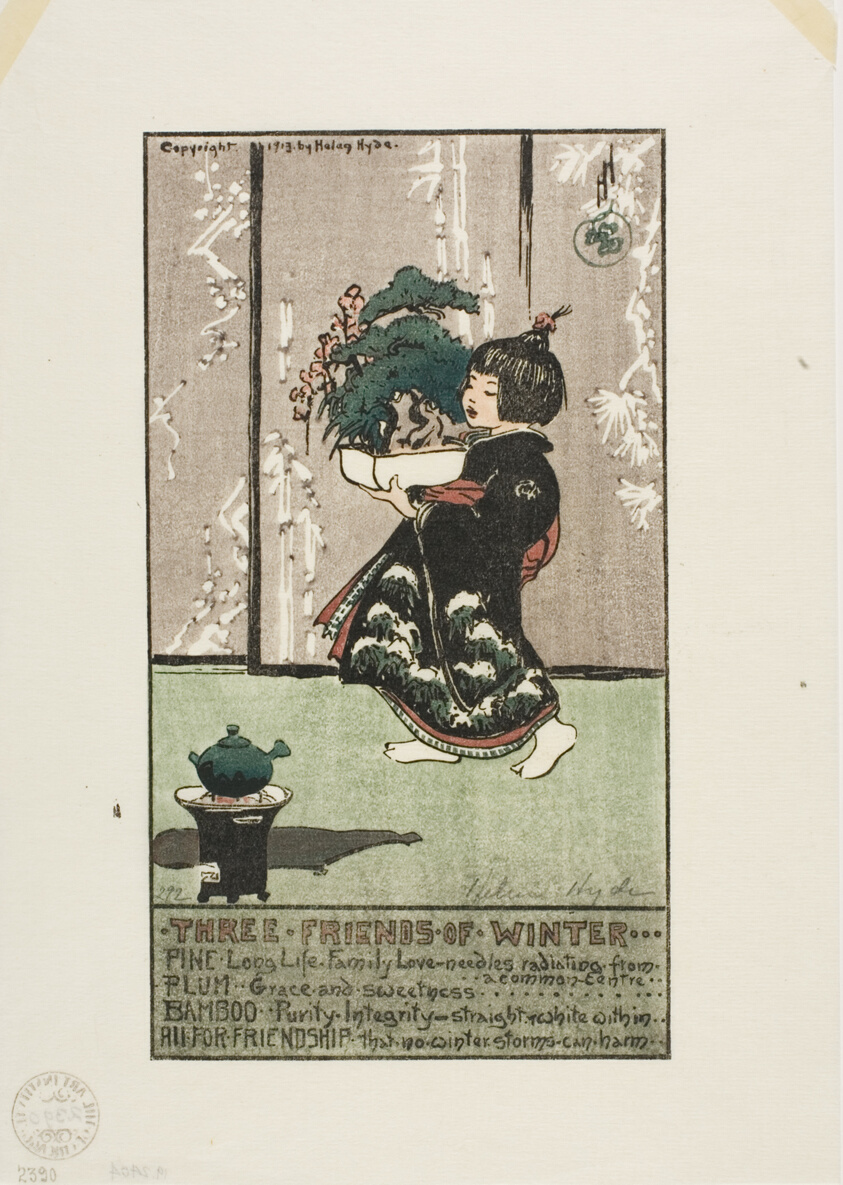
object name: Print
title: Three Friends of Winter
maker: Helen Hyde (American, 1868-1919)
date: 1913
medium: Color woodcut on cream Japanese paper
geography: United States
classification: woodcut; print; prints and drawing